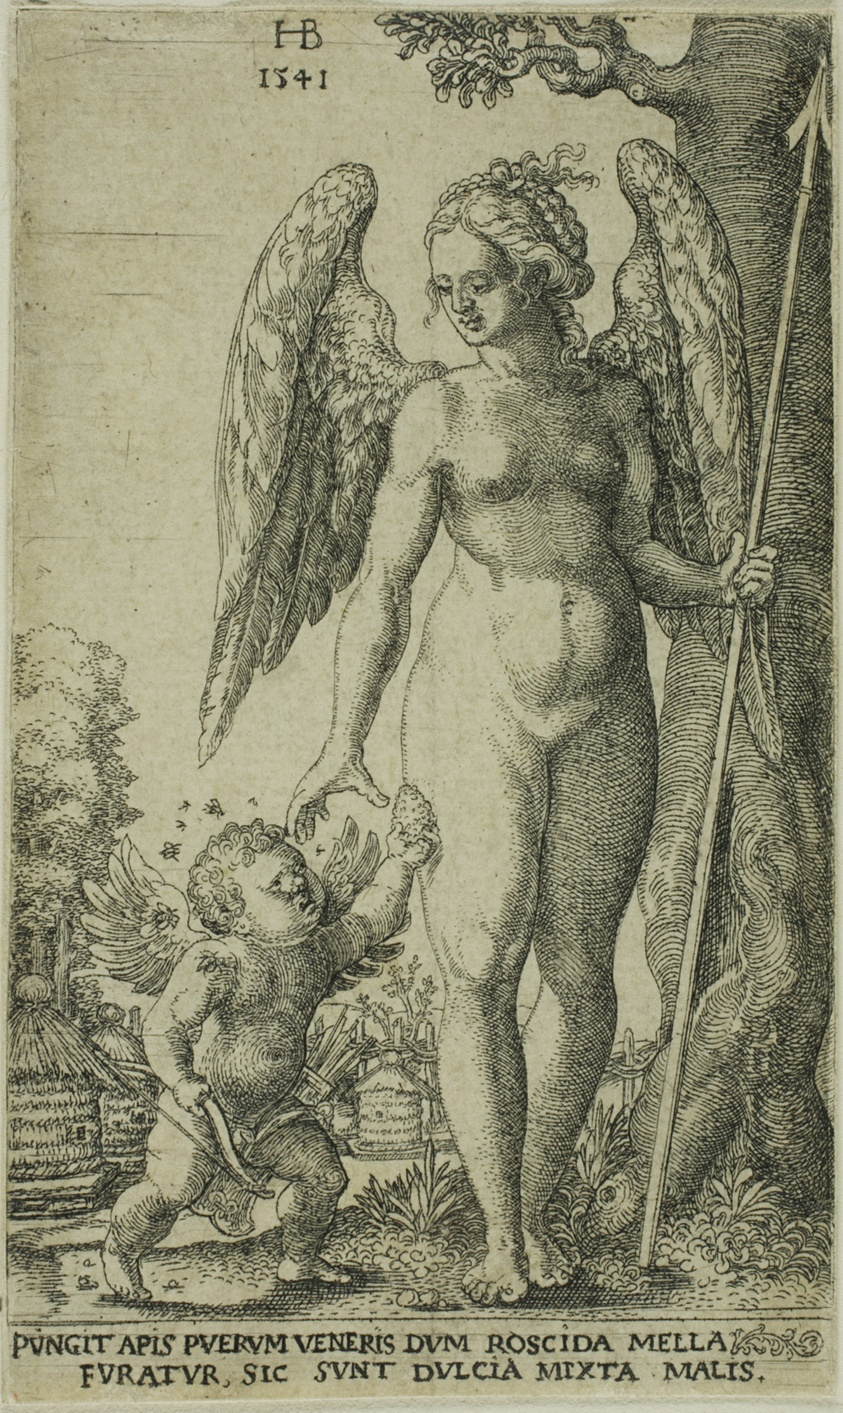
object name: Print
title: Cupid Bringing and Honeycomb to Venus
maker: Hans Brosamer (German, c. 1500-1554)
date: 1541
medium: Engraving in black on cream laid paper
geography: Germany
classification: engraving; print; prints and drawing